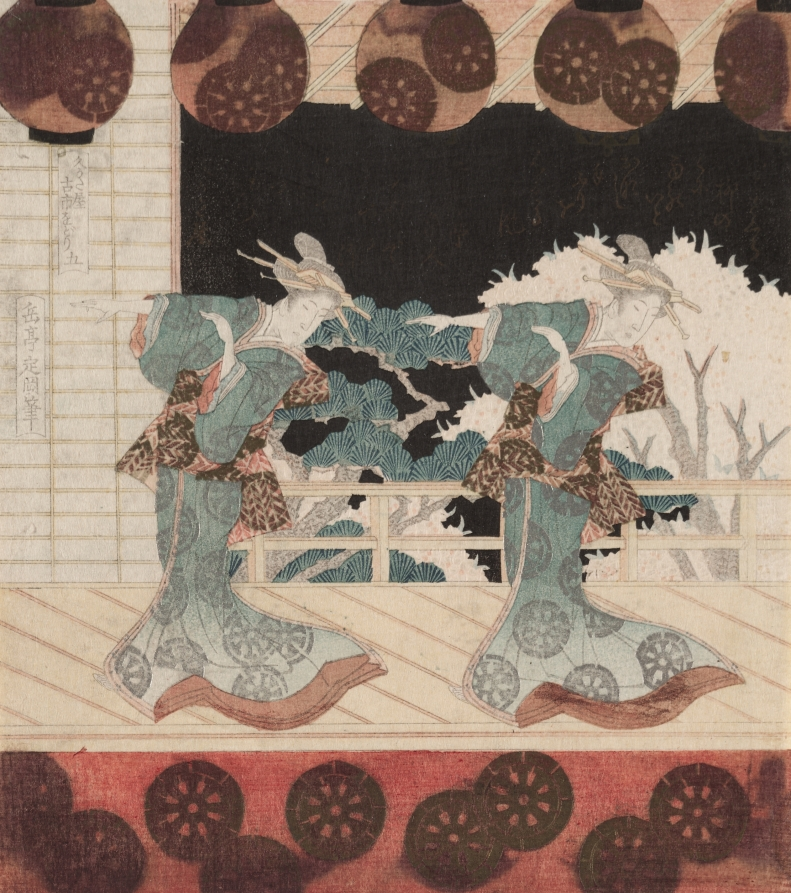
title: Furuichi Dance at the Hisagataya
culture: Japan, Edo period (1615–1868)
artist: Gakutei Harunobu (Japanese, 1786(?)–1868)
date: mid 1820s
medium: fifth of a pentaptych of woodblock prints; ink and color on paper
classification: Print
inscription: Signature: Gakutei Sadaoka hitsu